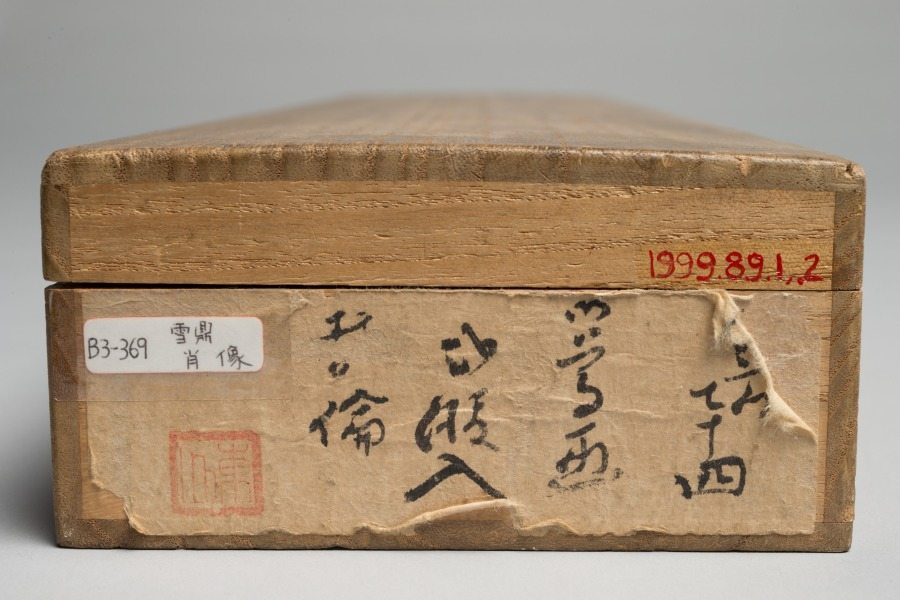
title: Pair of Portraits of Samurai-Officials: Hirai Kyosei and Hirai Rinsei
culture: Japan, Edo period (1615–1868)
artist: Sando Hyosho (Japanese)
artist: Tsukioka Settei (Japanese, 1710–1786)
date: 1776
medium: hanging scrolls; ink and color on silk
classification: Painting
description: In this pair of figure paintings, the artist provided generational portraits of two clan leaders from the Hirai family, accompanied by lengthy inscriptions in a distinctive calligraphic style from separate scholar-officials.